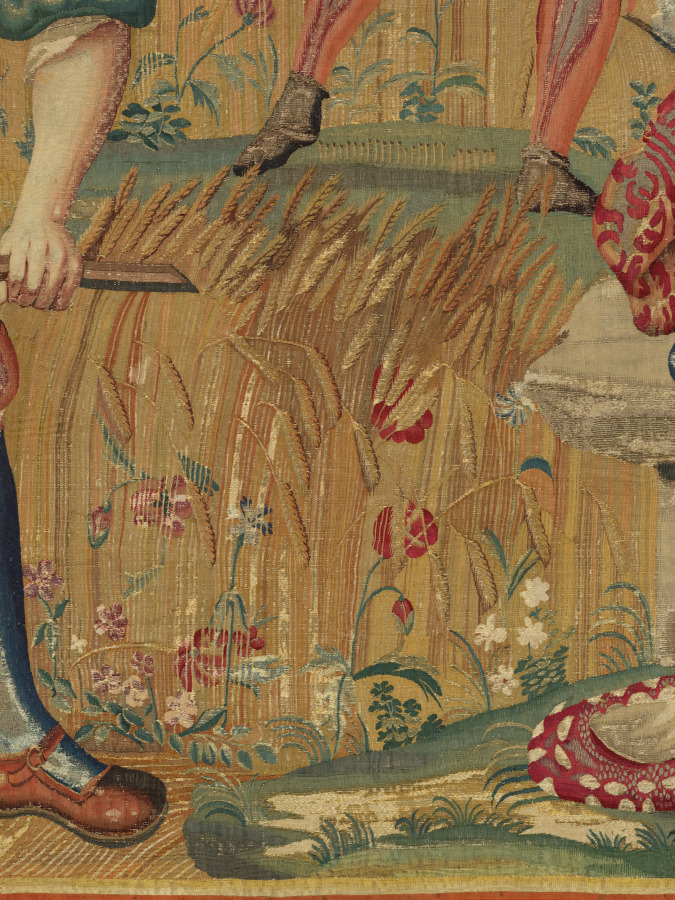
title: Summer: Harvest Scene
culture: France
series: Four Seasons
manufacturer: possibly by Gobelins Manufactory (France, Paris, est. 1662)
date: designed c. 1535, woven mid- to late 1600s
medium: Wool, silk, and gold filé: tapestry weave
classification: Tapestry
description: The wheat harvest took place in July and represented the hard, hot work of summer. The reaper in the foreground and his companion in the middle distance swing their scythes high above their heads as they prepare to cut the wheat stalks. Underneath the shade of an apple tree, three figures in the foreground are determining a price for the wheat. A woman gestures to the coins that the seated man is counting. Behind them another man holds an account book, in which he records their decisions. His pen holder and ink pot hang from his belt. In the distance to the right, two horses draw a cart piled high with wheat toward four farmers who gather bunches of wheat stalks together and tie them into bundles.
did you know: Images of the harvest provided a way to express pride in the fruitfulness and plenty of a particular region and celebrate the diligence of the field laborers.